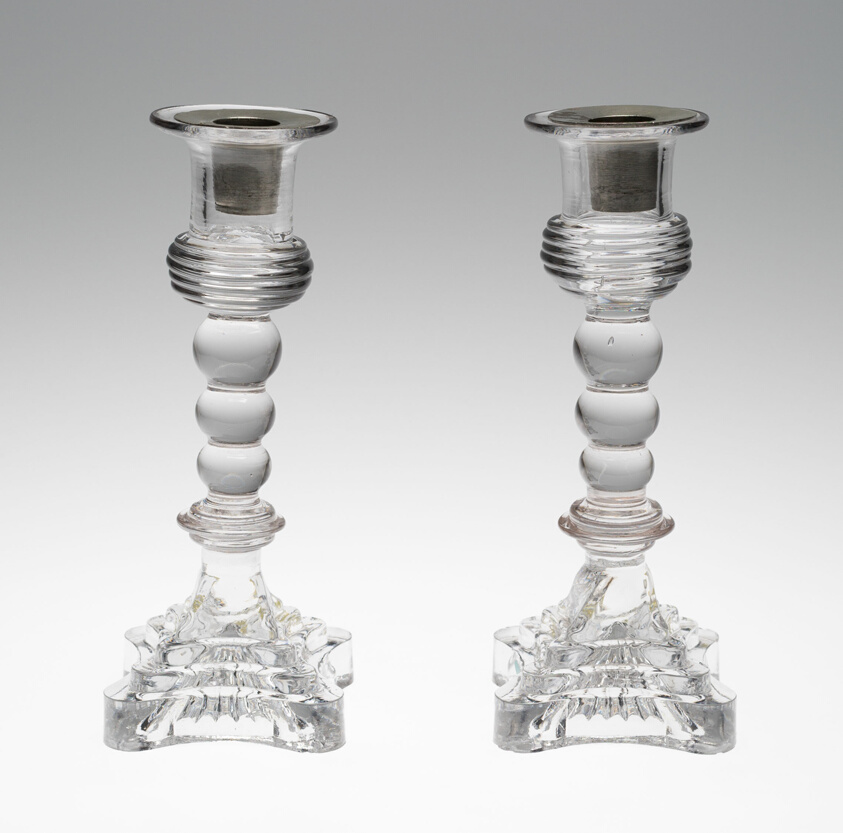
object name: Glass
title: Pair of Candlesticks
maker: Artist unknown (American, 19th century); Pittsburgh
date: 1830–40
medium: Pressed and blown glass, pewter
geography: Pittsburgh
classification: candleholder - candlestick; glass; american decorative arts; american arts; decorative arts